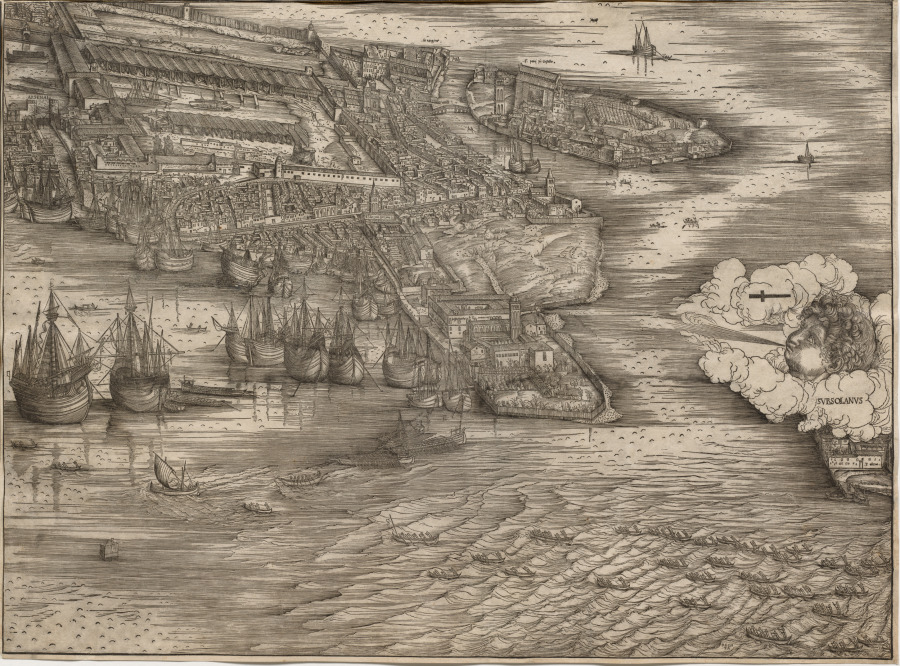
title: View of Venice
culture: Italy, early 16th Century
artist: Jacopo de' Barbari (Italian, c. 1460/70–c. 1516)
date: 1500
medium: woodcut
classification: Print